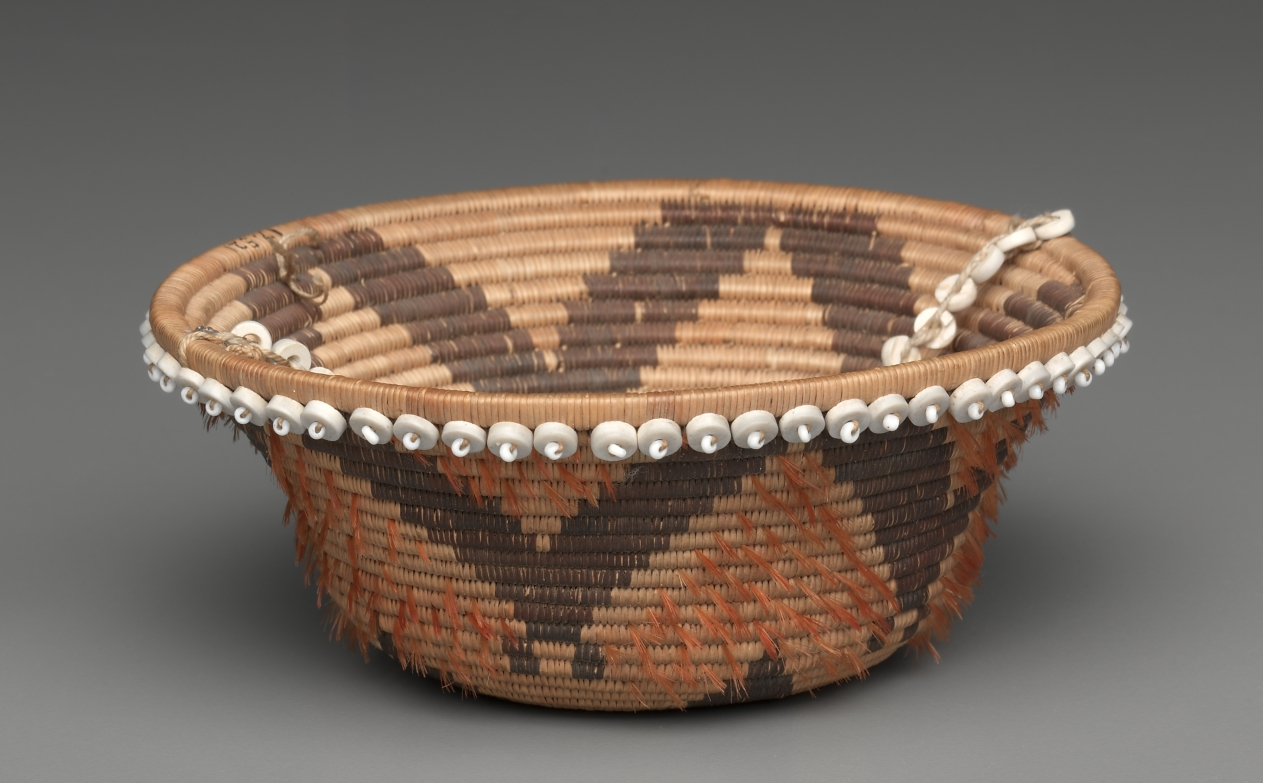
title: Gift Basket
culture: California, Pomo, Lytton Springs, Alexander Valley, late 19th-early 20th century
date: 1895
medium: Bulrush, Sedge; Coiled (3 rods)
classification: Basketry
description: These baskets were probably created to be sold to non-Indian collectors and tourists. The feathered basket, however, is based on an older type that was given as a treasured gift on various occasions, including ceremonies that marked the stages of life (birth, puberty, marriage, and so forth).